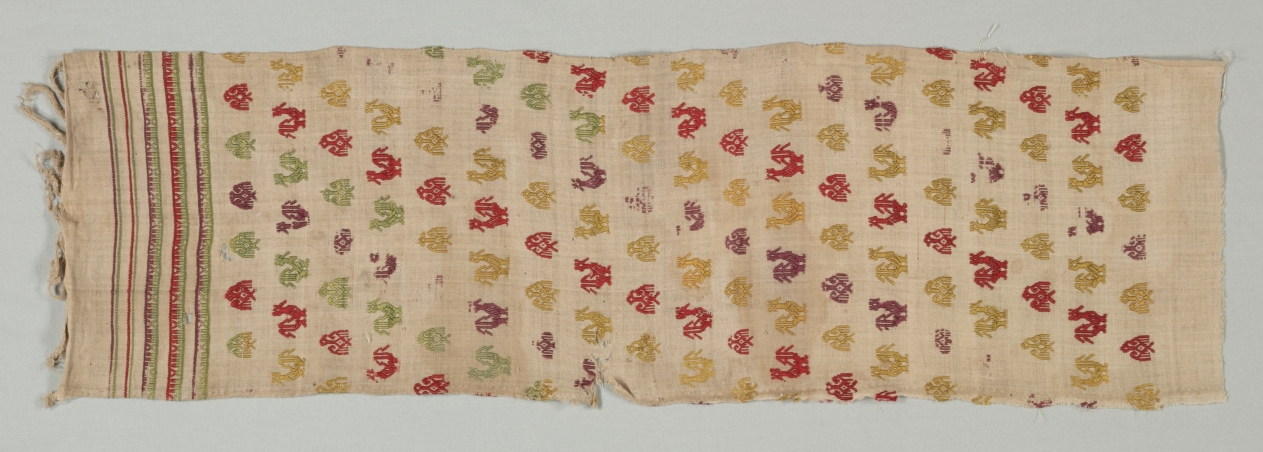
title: Textile Fragment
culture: Turkey, Asia Minor(?)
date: 19th century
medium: silk and linen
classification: Textile